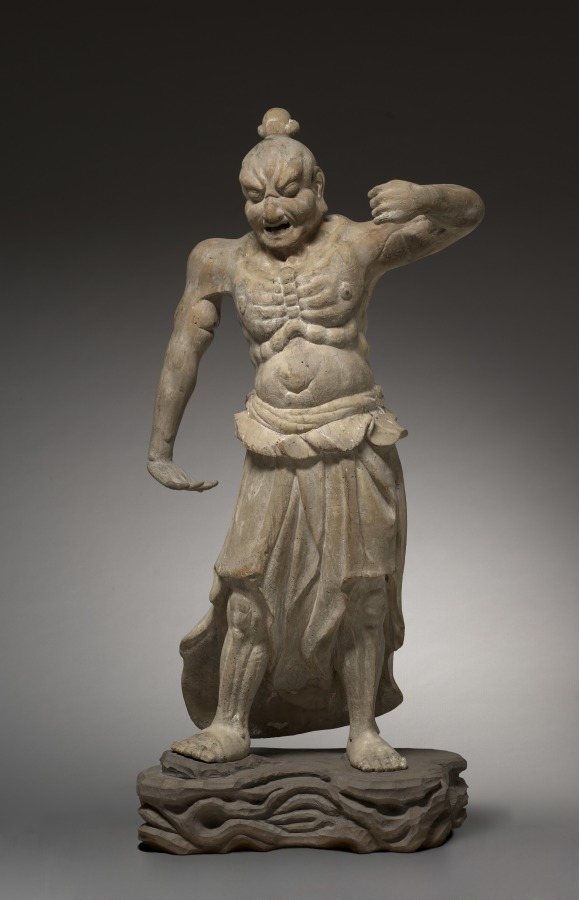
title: Pair of Guardian Kings (Niō)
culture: Japan, Kamakura period (1185–1333)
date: 1200s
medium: Chestnut and cypress wood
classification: Sculpture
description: These wrathful protectors of Buddhism would have once stood within the sides of the main entrance gate to a temple. One has an open mouth that intones the sound ah, and symbolizes the beginning, or life.One has a closed mouth that intones the sound un, and symbolizes the end, or death.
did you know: This is one of a pair of guardian kings, or Nio. Their fierce expressions and postures indicate their protective function.